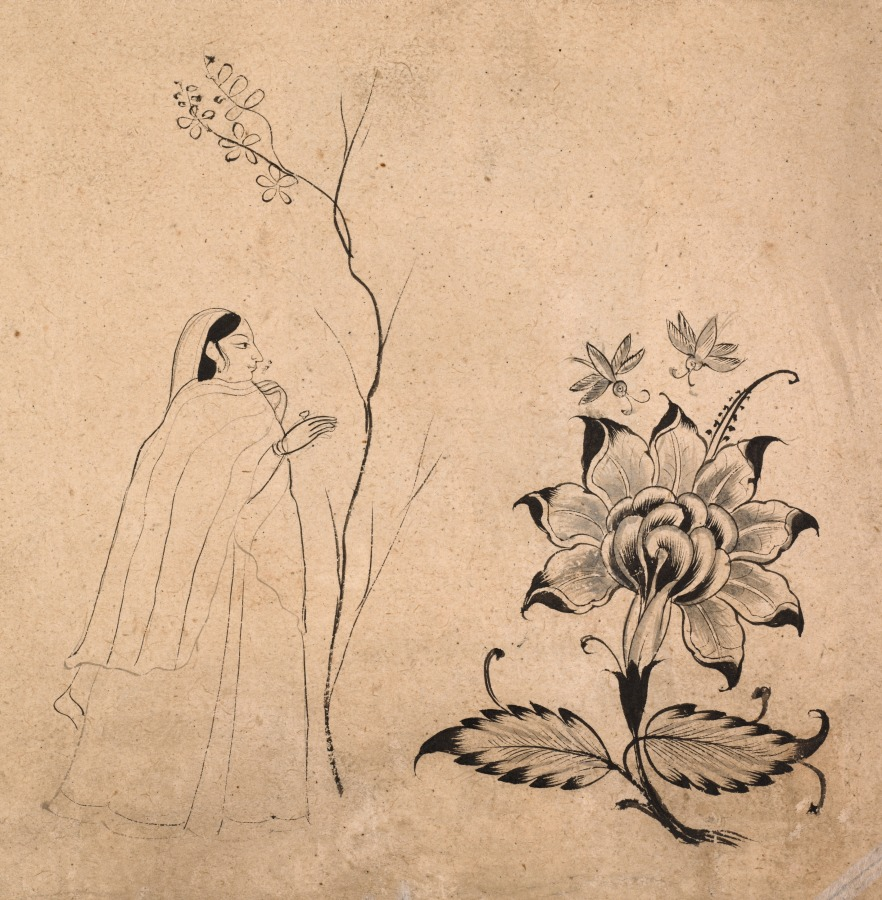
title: Two Elephants Fighting in a Courtyard Before Muhammad Shah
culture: India, Guler school, 18th century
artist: attributed to Nainsukh (Indian, 1710–1778)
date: c. 1730–40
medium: Gum tempera and ink on paper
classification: Painting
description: The Mughal emperor responsible for a revival of courtly arts and pastimes was Muhammad Shah (reigned 1719–48). This painting was made by an artist from a small kingdom in the western Himalayas who stayed at the Mughal court in Delhi and painted scenes of his experiences. Like his predecessors, Muhammad Shah enjoyed watching elephant fights. He is shown in his window of public audience, marked by a golden carpet, smoking a hookah. Women from his harem can be seen looking on from behind painted screens. Two pairs of men hold fire brands and spears to prevent the elephants from running off and to keep them under control. The intensity of the fight—captured at a moment when one mahout, or elephant trainer, has dropped his goad and is about to jump off—is augmented by the dense colors and forms in contrast to the otherwise pale planes, balanced only by the strip of palace windows.